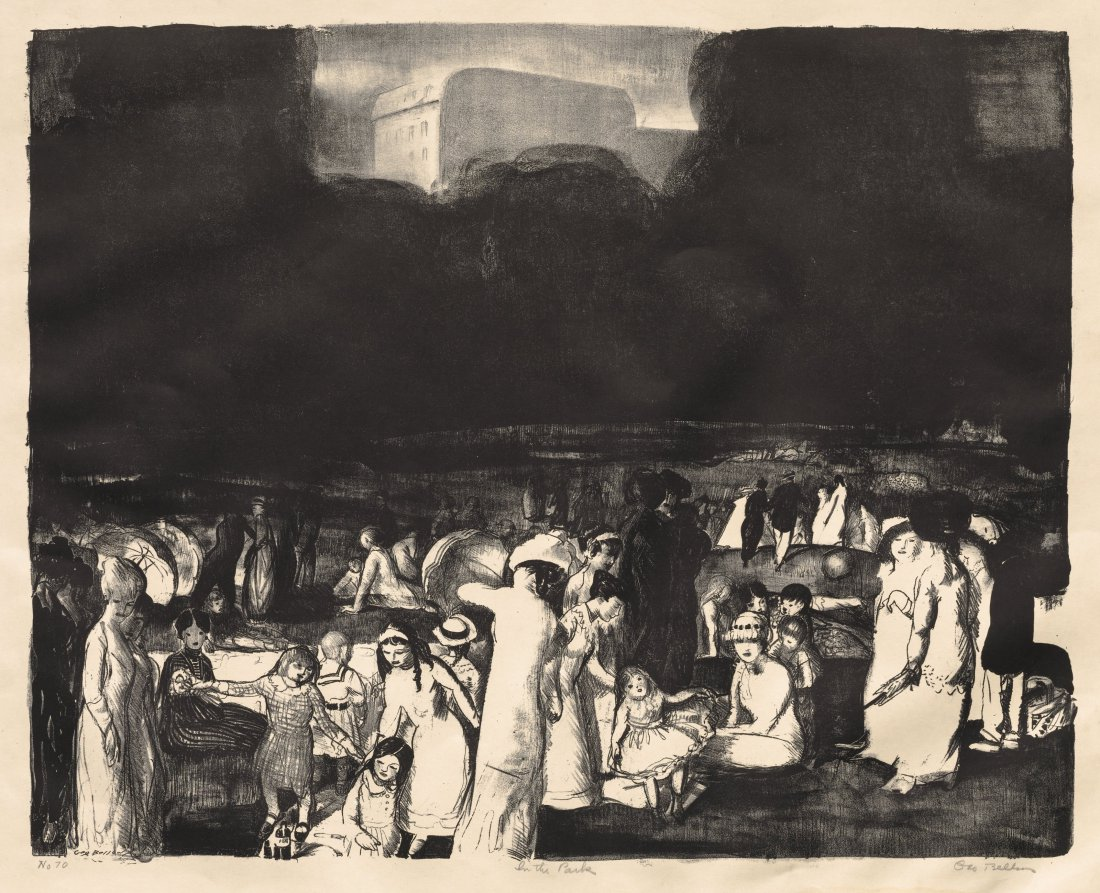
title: In the Park, Dark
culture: America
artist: George Bellows (American, 1882–1925)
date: 1916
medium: lithograph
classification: Print